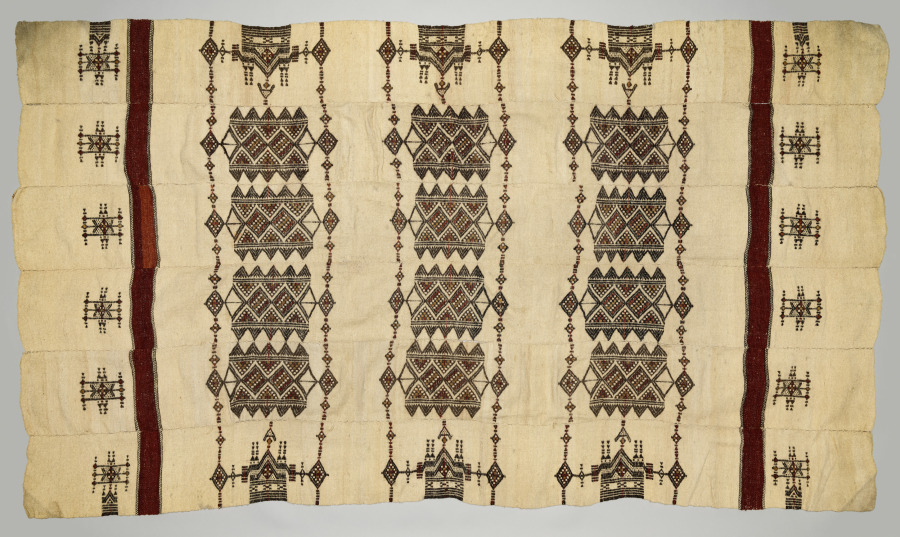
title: Blanket or Cover (Kaasa)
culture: Africa; West Africa; Mali, Niger, or Burkina Faso; Fulani (Peul) style; unknown weavers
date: c. 1930s or earlier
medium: Wool, dye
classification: Textile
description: Made on order, this blanket was hand woven in six strips that were sewn together at the selvages to make the full textile. Repeated named, symbolic geometric motifs in deep browns, blacks, and reds create an overall sense of rhythmic dynamism as naturally dyed colored floated weft (horizontal) threads dance in and out of the undyed cream-colored wool base textile. Some motifs have ties to Islam, as the Fulani were among the first West Africans to convert, or to nearby Tuareg cultures.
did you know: Weavers don’t make sketches to plan the design for this textile but recall it from memory instead.